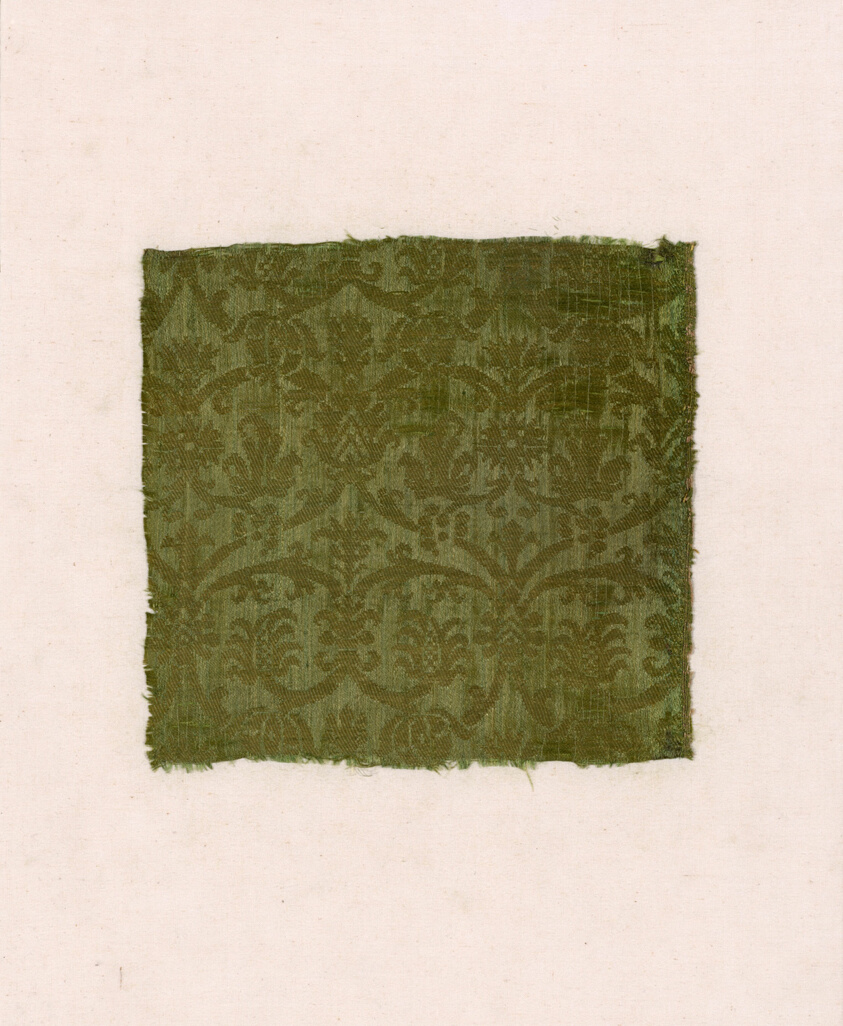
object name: Textile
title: Fragment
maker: Italy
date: 1575/1600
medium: silk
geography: Italy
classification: textile; weaving